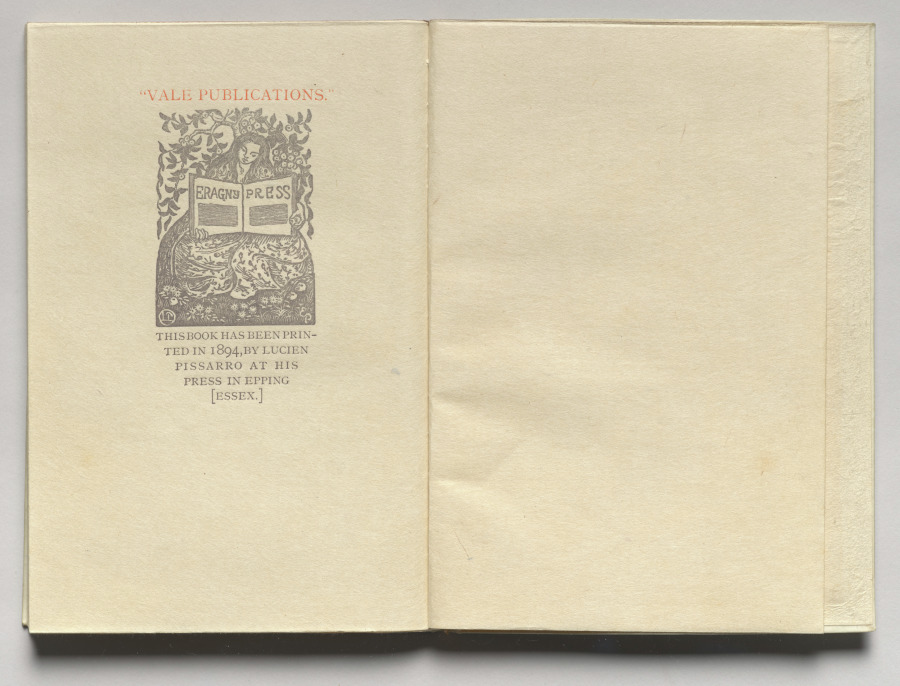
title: The Queen of the Fishes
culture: England, 19th century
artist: Lucien Pissarro (British, 1863–1944)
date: 1894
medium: Bound volume with color wood-engraved illustrations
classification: Bound Volume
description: “The Queen of the Fishes” is a French fairy tale about two mistreated children who turn into a fish and an oak tree. This edition was the first book published by the Eragny Press, the private firm of Lucien Pissarro, son of impressionist painter Camille Pissarro. Following the example of William Morris, Lucien wanted to return to the careful design and high-quality materials of early printed books. He and his wife, Esther Bensusan Pissarro, made this publication almost entirely by hand, including designing and engraving all the illustrations and ornaments.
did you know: Lucian Pissarro was a son of Impressionist painter Camille Pissarro.